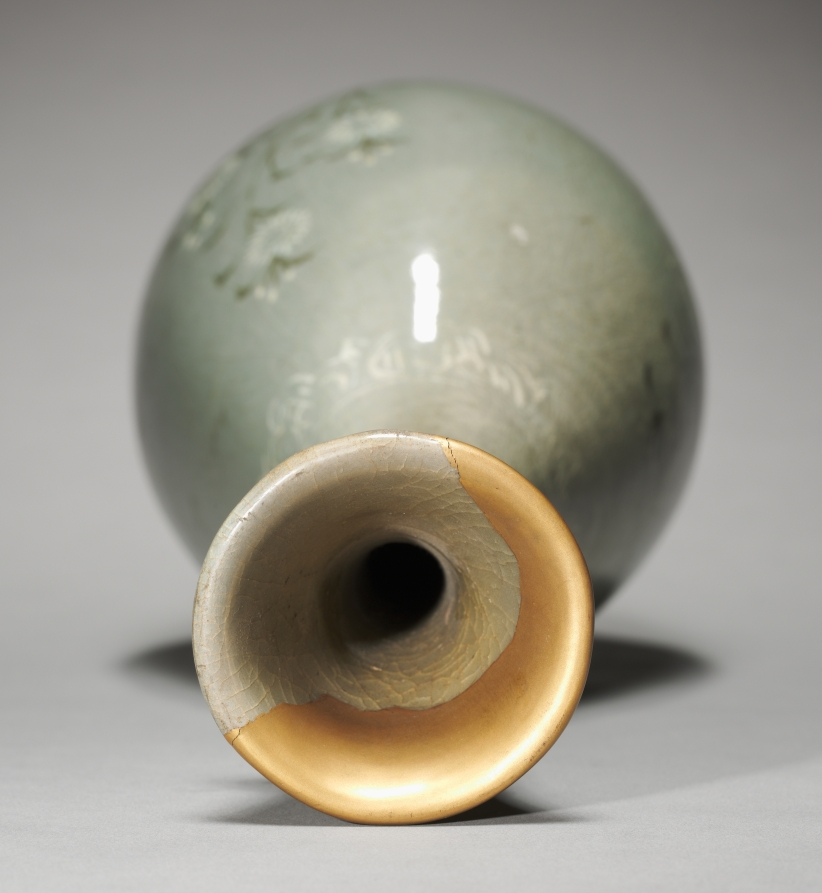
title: Bottle with Chrysanthemum Design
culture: Korea, Goryeo dynasty (918–1392)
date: 1200s-1300s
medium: Celadon ware with inlaid white and black slip decoration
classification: Ceramic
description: This rare long-neck celadon wine bottle is inlaid with white wild chrysanthemums, symbols of both the poem "Drinking Wine" and blessings of longevity. One root has three stems with tiny white blossoms. The damaged lip was repaired with gold lacquer. Korean Celadons Repaired with Gold Termed kintsugi (literally meaning “gold joinery”) in Japanese, this method of repair highlights broken parts with glittering gold mixed with lacquer. Initiated in 15th-century Japan, the technique follows a popular aesthetic concept called wabi-sabi, which finds beauty in imperfect things and continued to be practiced throughout the modern period in East Asia. Goryeo celadons were considered extremely rare treasures among modern collectors; thus, the broken condition of these examples is brilliantly highlighted in gold lacquer on the repaired spouts, handle, and lid.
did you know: Termed kintsugi (literally meaning “gold joinery”) in Japanese, this method of repairing broken parts with glittering gold mixed with lacquer was extensively used for ceramic works in the Goryeo period, such as this one.